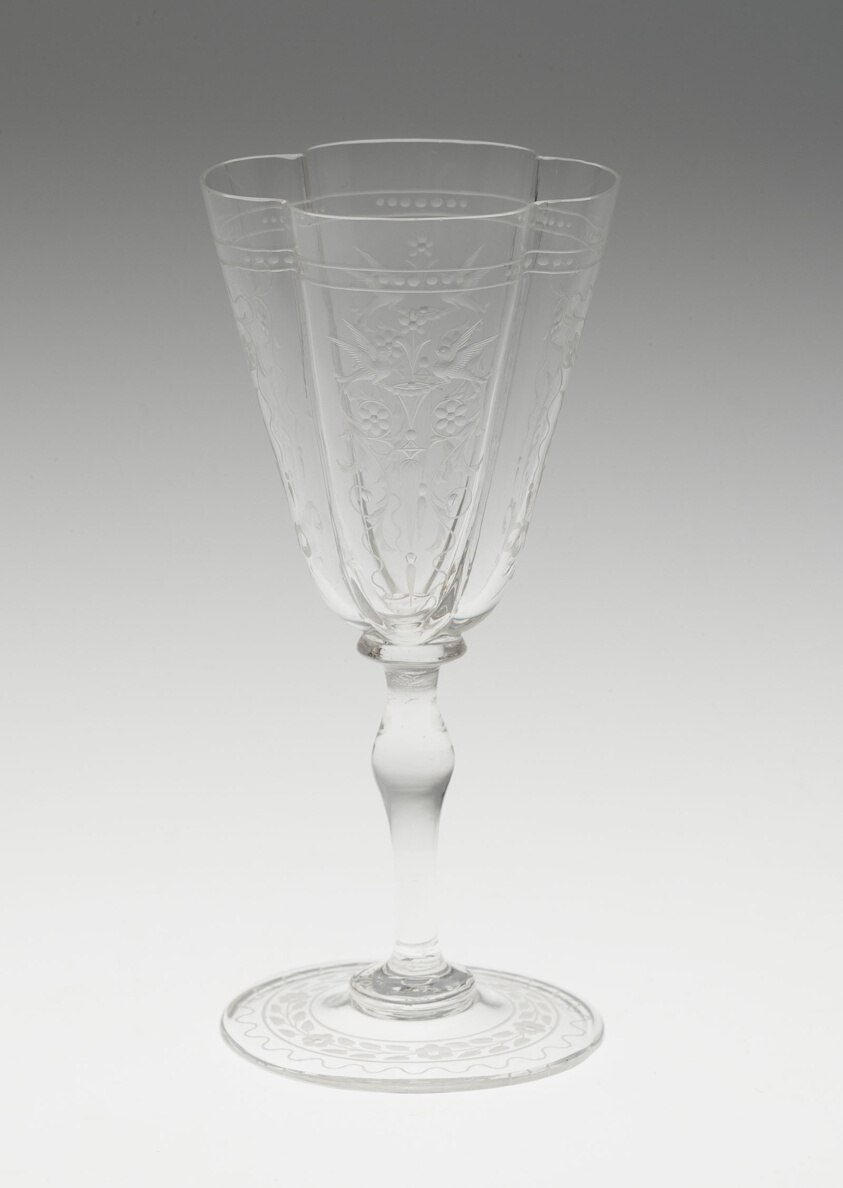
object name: Glass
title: Wine Glass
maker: J. & L. Lobmeyr (Austrian, founded 1822)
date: 19th century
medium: Glass; clear and blown with quadri-lobed bowl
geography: Austria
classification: drinking vessel; glass; european decorative arts